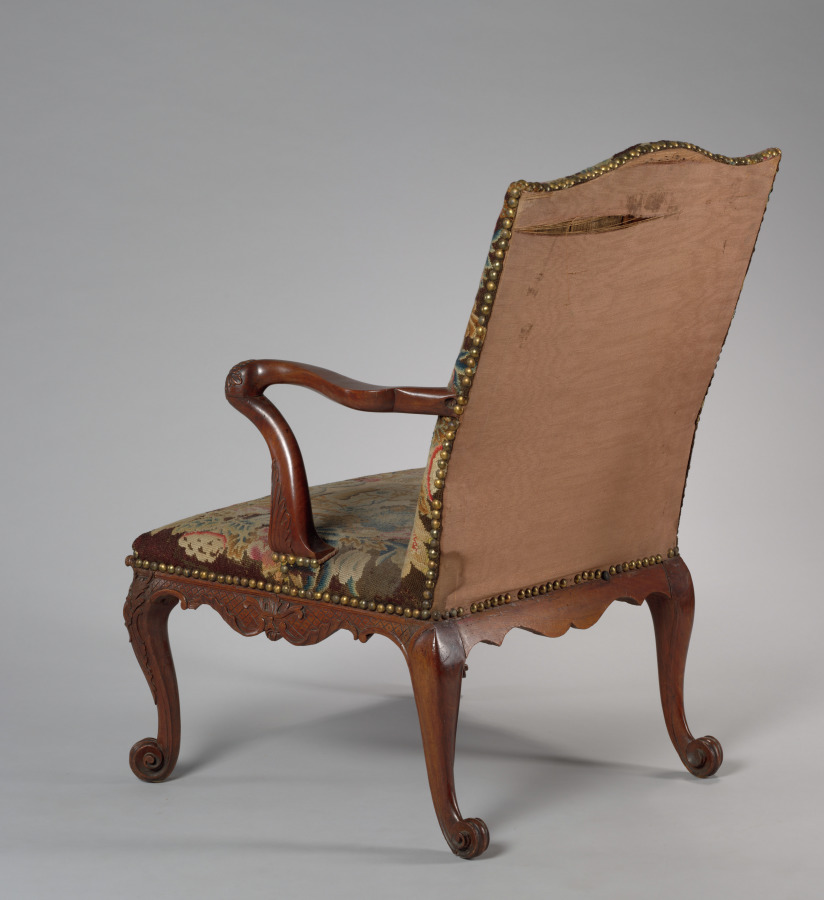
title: Armchair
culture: England, 18th century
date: 1760–1765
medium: mahogany upholstered in needlework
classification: Furniture and woodwork